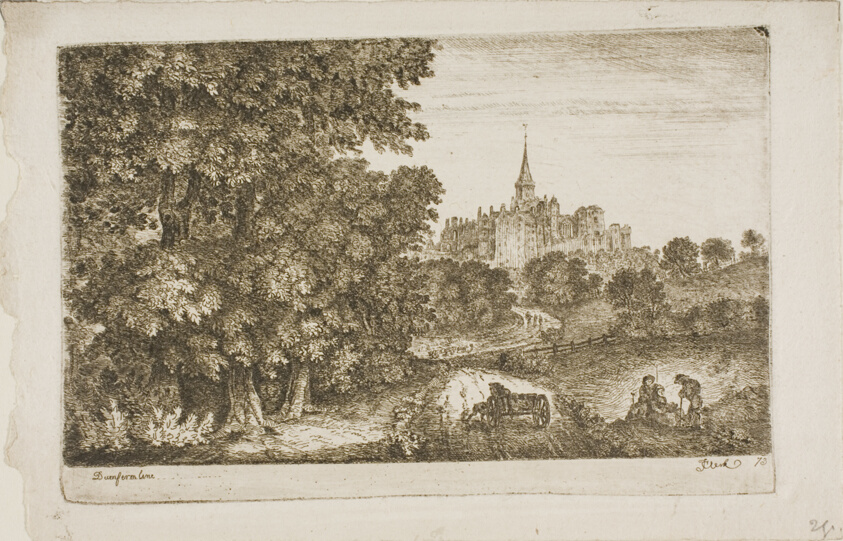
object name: Print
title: Dunfermline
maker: John Clerk of Eldin (Scottish, 1728-1812)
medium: Etching on paper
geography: Scotland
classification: etching; print; prints and drawing